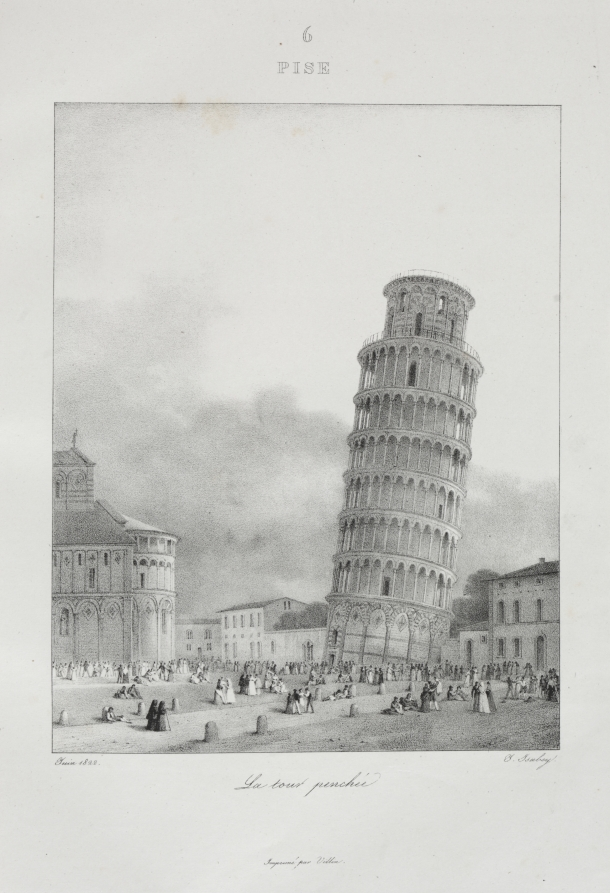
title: Voyage en Italie en 1822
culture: France, 19th century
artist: Jean-Baptiste Isabey (French, 1767–1855)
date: 1833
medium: lithograph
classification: Bound Volume